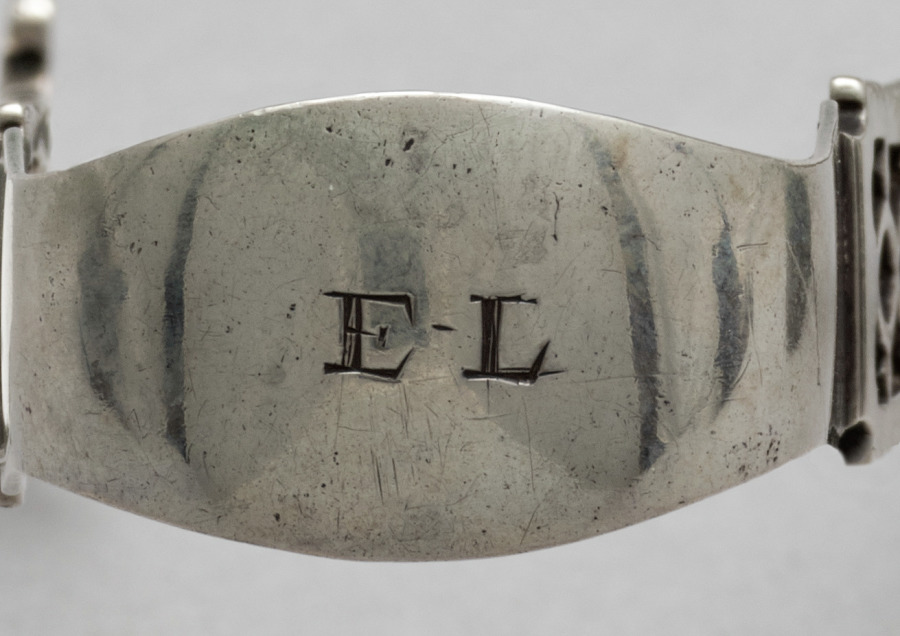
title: Sugar Tongs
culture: England, 18th century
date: 1775–1799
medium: silver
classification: Silver